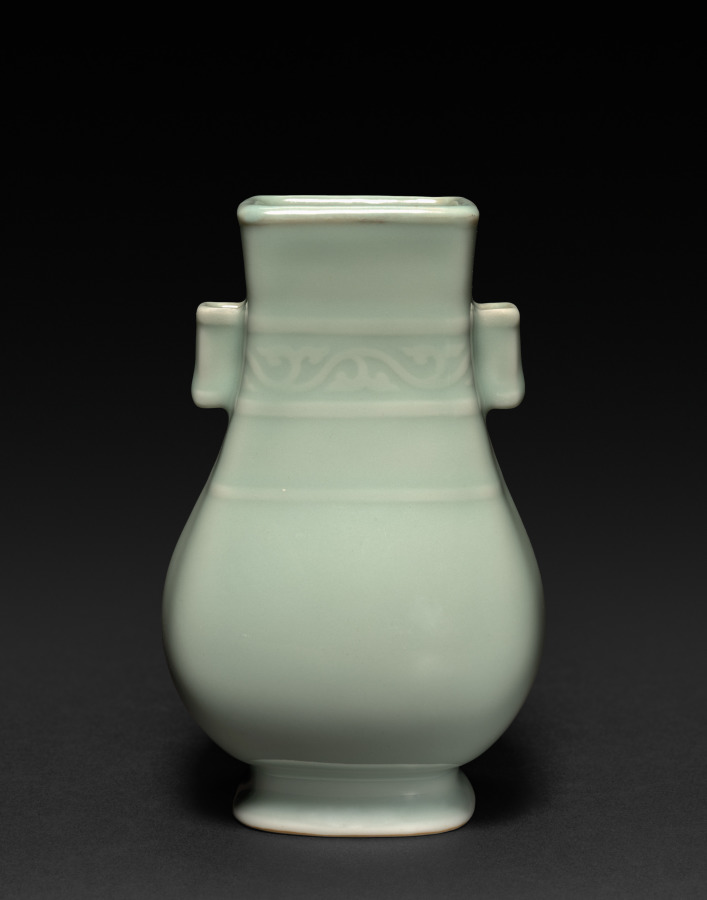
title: Vase in Form of Archaic Hu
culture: China, Jiangxi province, Jingdezhen kilns, Qing dynasty (1644-1911), Qianlong mark and reign (1736-95)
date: 1736–95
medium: porcelain with celadon glaze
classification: Ceramic